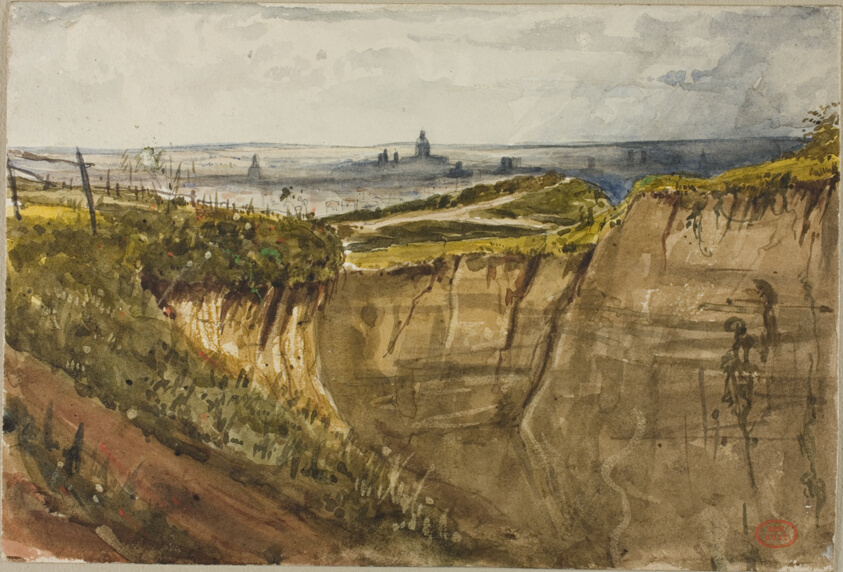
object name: Drawing and Watercolor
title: View of Paris, from Meuden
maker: Paul Huet (French, 1803-1869)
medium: Watercolor, with traces of gouache, over graphite, on ivory wove paper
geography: France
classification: watercolor; drawings (visual works); prints and drawing